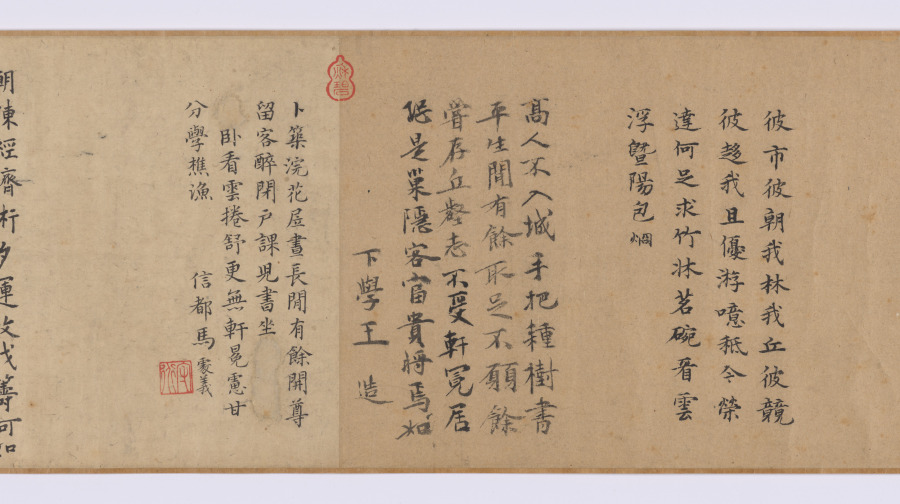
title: Leisure Enough to Spare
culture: China, Yuan dynasty (1271-1368)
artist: Yao Tingmei (Chinese, active mid-1300s)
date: 1360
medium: handscroll, ink on paper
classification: Painting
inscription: 至正廿年春正月_日作此併系鄙語于尾 地偏人遠閉柴關，滿院松陰白晝閒。 眼底風塵渾忘却，坐看流水臥看山。 吳興姚廷美畫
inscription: 23 colophons and 53 seals (dates unavailable for some): 1 colophon, dated 1360, and 2 seals of Yang Weizhen (1296-1370); 1 colophon and 3 seals of Wan Yi; 1 colophon of Zhang Junde; 1 colophon and 3 seals of Angji (act. ca. mid-14th c.); 1 colophon and 1 seal of Xu Shiquan; 1 colophon and 3 seals of Gao Yu; 1 colophon and 2 seals of Li Mingfu; 1 colophon and 2 seals of Lu Lin; 1 colophon and 1 seal of Zhang Qian; 1 colophon of Tao Tangwen; 1 colophon and 1 seal of Wu Yuangui (act. ca. 1300-60); 1 colophon of Bao Jiong; 1 colophon of Wang Zao; 1 colophon and 1 seal of Ma Chuyi; 1 colophon and 1 seal of Lin Yizhuang; 1 colophon and 1 seal of Gu Shunju; 1 colophon and 2 seals of Wang Jing; 1 colophon and 2 seals of Lin Shouchang; 1 colophon and 1 seal of Gao Zhidao; 1 colophon of Lin Xun; 1 colophon, dated 1359, and 2 seals of Meng Weicheng (act. mid-14th c.); 1 colophon and 1 seal of Meng Zhiji (act. mid-l4th c.); 14 seals of Liang Qingbiao 梁清標 (1620-1691); 1 poem dated 1755 and 5 seals of the Qianlong 乾隆 emperor (r. 1736-95); 2 seals of the Jiaqing 嘉慶 emperor (r. 1796-1821); 3 seals of the Xuantong 宣統 emperor (r. 1909-11).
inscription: Title on frontispiece by Zhang Bi 章弼: Signed Gongchen 拱辰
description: Seclusion and leisure—the ideals of the literati, or scholar-gentlemen—are expressed in this mature work by Yao Tingmei. The theme acquired special meaning at a time of the military uprisings near the end of the Yuan dynasty. Dedicated to an ascetic named Du, this work combines painting, calligraphy, and poetry; following the painting are more than 20 poems and essays written by notable scholars, one of whom was the calligrapher Yang Weizhen. It reveals not only the aesthetic taste of the literati but also the practice of contributing artistic and literary works to fulfill social obligations. Yao's painting demonstrates his individual style derived from various ancient masters (Guo Xi, Dong Yuan, and Juran). Yang Weizhen's calligraphy exhibits his bold, vigorous style and his intent to capture the spirit of antiquity in art.